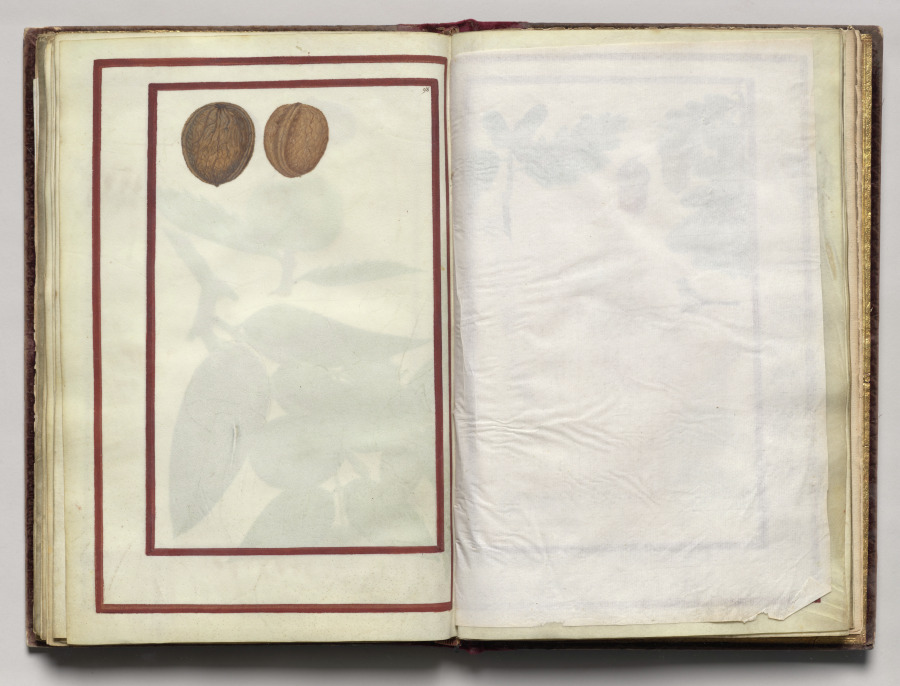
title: English Walnuts, folio 43 (verso), from Florilegium (A Book of Flower Studies)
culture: France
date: 1608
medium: watercolor, ink, silver, and gold over occasional traces of pencil, on vellum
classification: Bound Volume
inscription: Dated: Poitiers 1608 (on frontispiece) Signed: On frontispiece in black ink, lower right: Van Kuyk Notation on drawing: Frontispiece: in pencil, lower margin: * élève de Van Kessel, peintre flammand (* in pencil also appears in front of Van Kuyk's name).